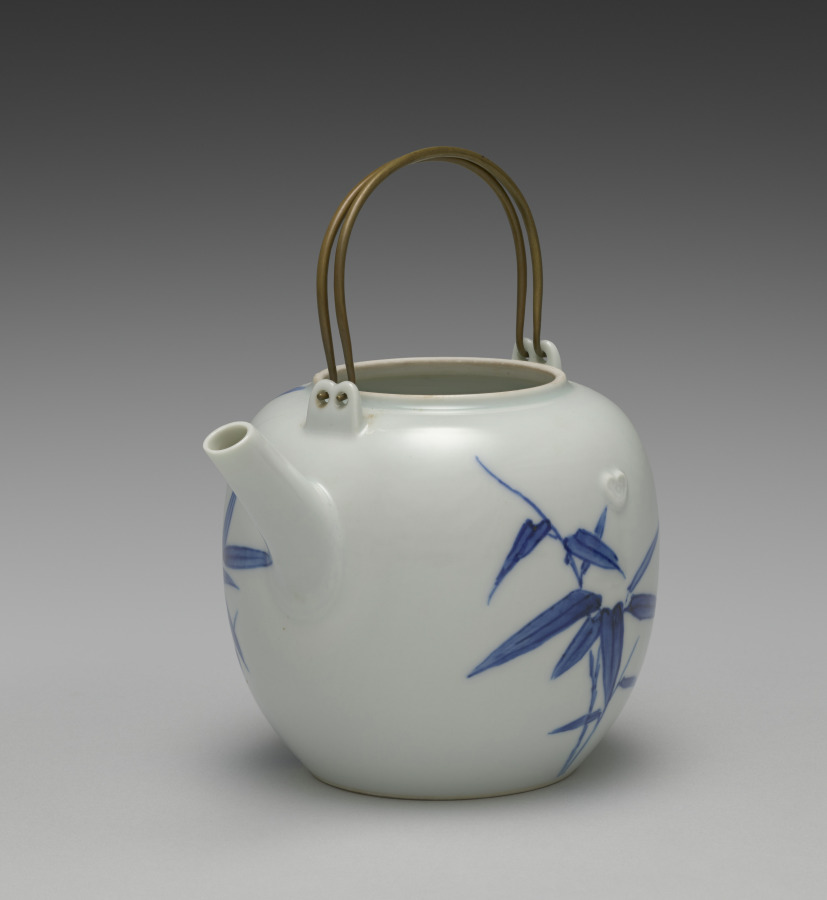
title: Teapot with Bamboo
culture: Japan, Taishō period (1912–26)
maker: Seifū Yohei IV (Japanese, 1872–1951)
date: 1914–46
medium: Porcelain with underglaze blue, molded decoration and metal handle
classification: Ceramic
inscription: 清風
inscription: 清風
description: This teapot has a well-balanced design of bamboo in underglaze blue and nyoi staff-head motifs applied to both sides at the shoulder.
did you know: There is a seal on the base of the teapot.